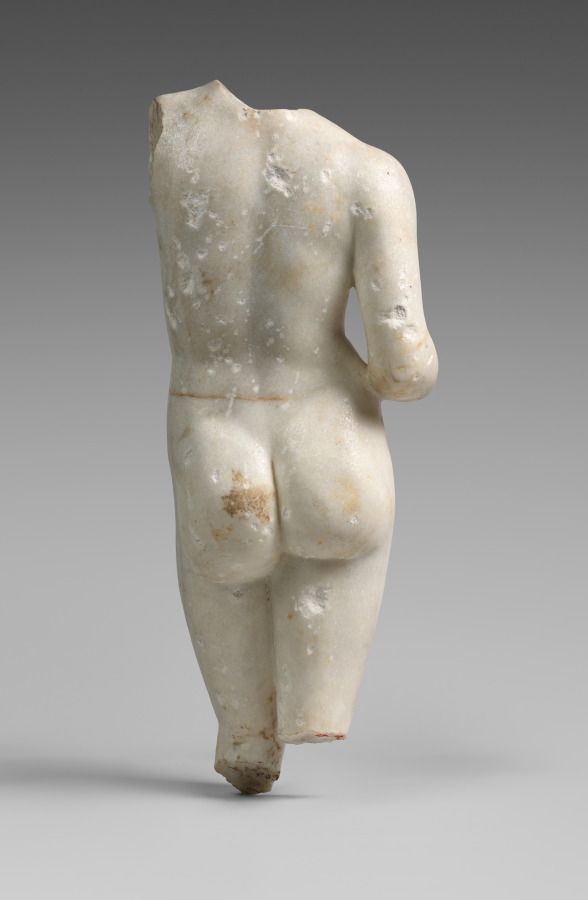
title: Torso of Venus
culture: Roman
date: 1–200 CE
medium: marble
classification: Sculpture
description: As avid collectors of Greek art, ancient Romans valued sculptures for their aesthetic qualities. This torso of Venus was likely inspired by the popularity of Praxiteles's nude Aphrodite from the Greek city-state of Knidos on the western coast of Asia Minor. Displayed in a circular shrine, it became one of the most celebrated sculptures in classical antiquity.